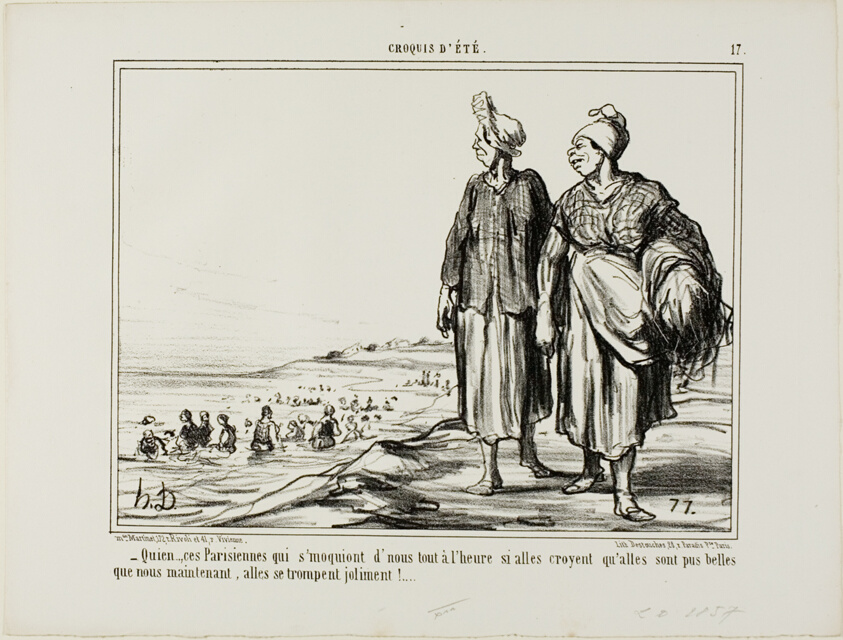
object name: Print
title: Quien...ces Parisiennes qui s'moquiont de nous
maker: Honoré Victorin Daumier; French, 1808-1879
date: 1857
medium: Lithograph in black on white wove paper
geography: France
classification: lithograph; print; prints and drawing